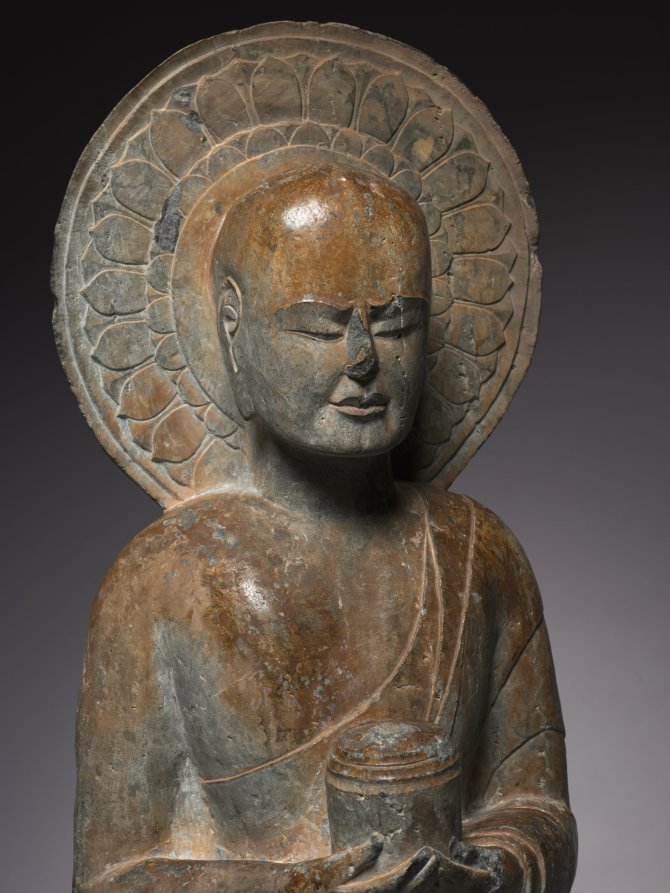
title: Standing Disciple Mahakasyapa Holding a Cylindrical Reliquary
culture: China, Hebei province, Southern Xiangtangshan caves, Northern Qi dynasty (550-577)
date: c. 550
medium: limestone with traces of pigment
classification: Sculpture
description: Mahakasyapa, the disciple of Shakyamuni, is presented with closed eyes in an expression of meditative concentration. He is holding a reliquary for the Buddha’s ashes, which symbolize the Buddha entering final spiritual attainment (nirvana) at death. The artistic simplicity exemplifies the spiritual content of this figure.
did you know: The complex of Buddhist cave temples at Xiangtangshan, “Mountain of Echoing Halls,” is a central achievement of the Northern Qi period.